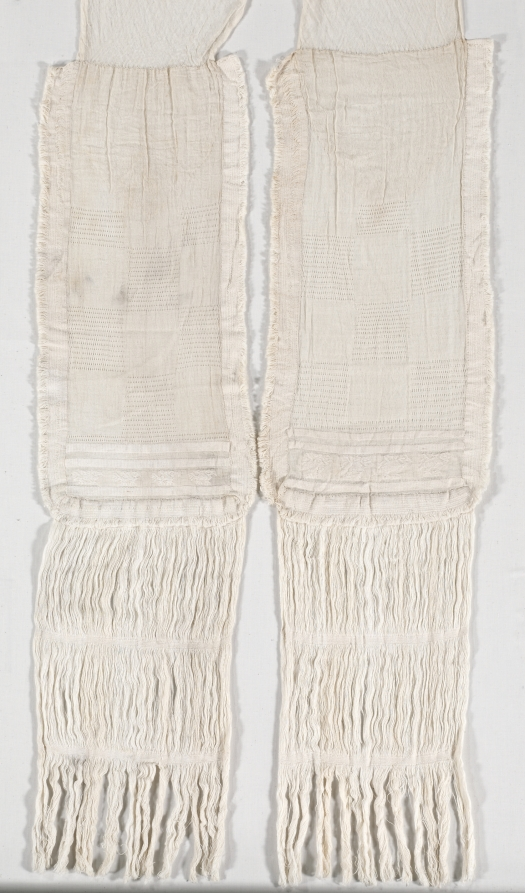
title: Turban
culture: Peru, North Coast, Chimú style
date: 1485–1640 (radiocarbon date, 95.4% probability)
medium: Cotton; plain weave, brocaded and complex alternating gauze with 5 shots of plain weave between gauze shots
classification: Garment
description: Chimú garments like this one consist of a large, rectangular central section—here measuring some 65 inches by 50 inches—with decorated tabs stitched to two opposite corners. Such garments probably were worn as turbans but we do not understand exactly how. For the purpose of display, the plain central section of this example has been folded to form a wide band, with the tabs arranged on either side.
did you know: The white cotton yarns used to make this textile are only 0.1 to 0.2 millimeters in diameter.